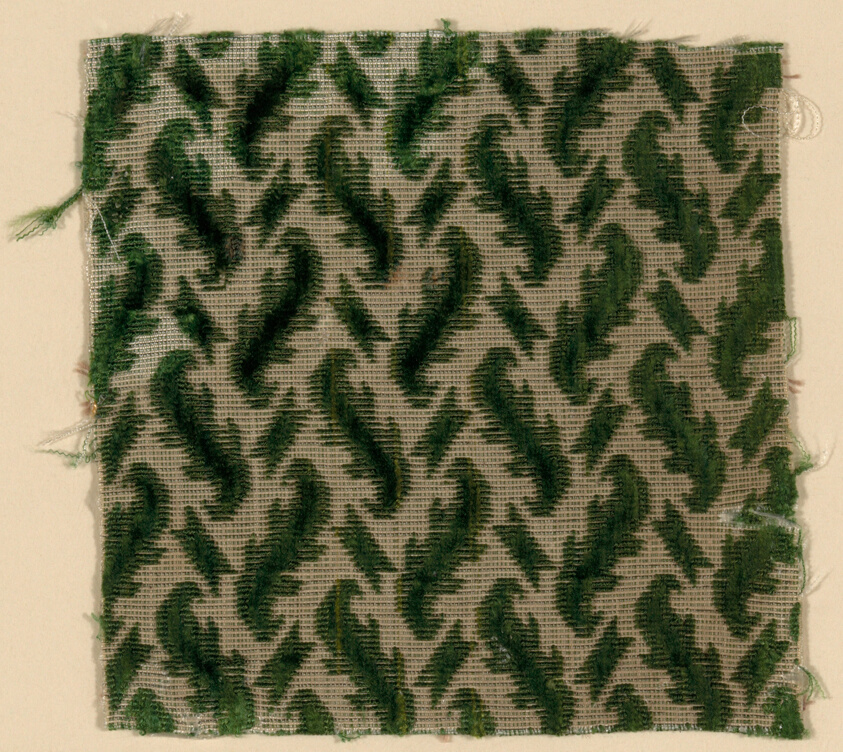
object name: Textile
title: Fragment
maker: Italy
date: 1601/35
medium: Silk and silvered-metal strips, plain weave with supplementary pile warps forming cut and uncut voided velvet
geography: Italy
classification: textile; weaving - velvet; weaving